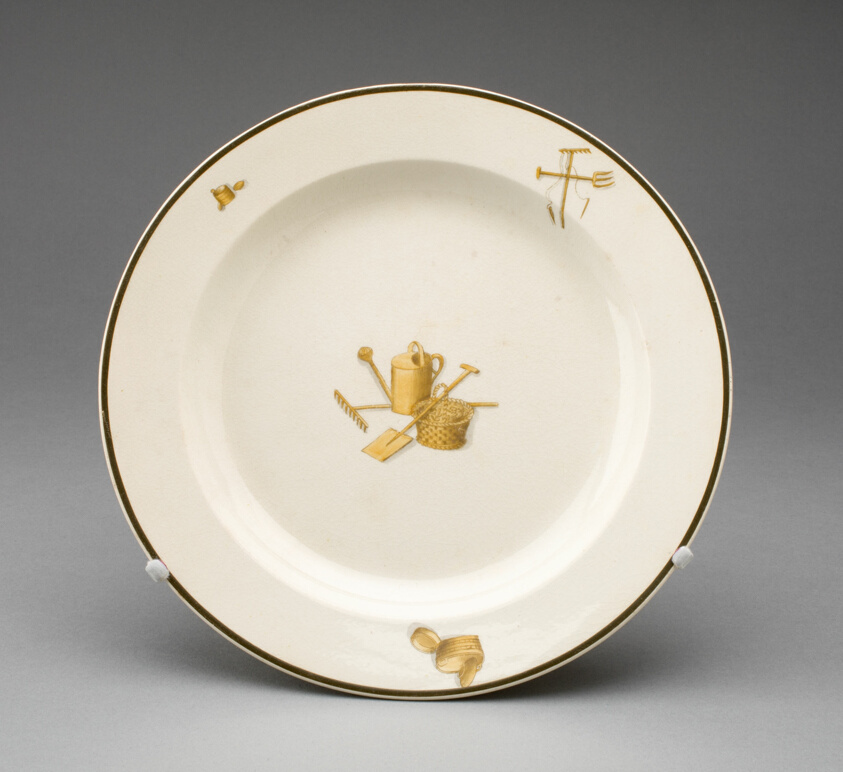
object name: Ceramics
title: Plate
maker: Wedgwood Manufactory (England, founded 1759)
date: c. 1775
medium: Lead-glazed earthenware (creamware) with yellow monochrome and brown enamel decoration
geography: Burslem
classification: plate (general, dish); dish (vessel); creamware (queensware); earthenware; european decorative arts; ceramics